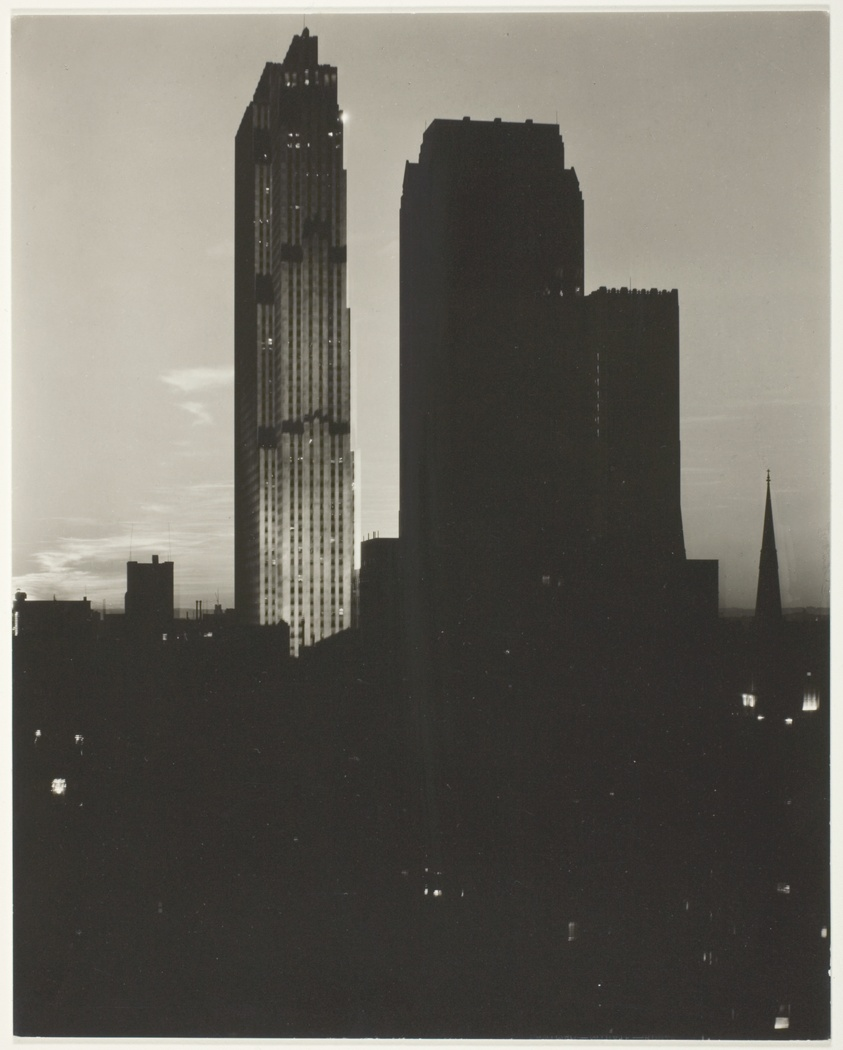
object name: Photograph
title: New York from the Shelton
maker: Alfred Stieglitz (American, 1864–1946)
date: 1935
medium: Gelatin silver print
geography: United States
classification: gelatin silver (developing-out-paper) pr; photographic process; photography; photograph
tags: cityscapes